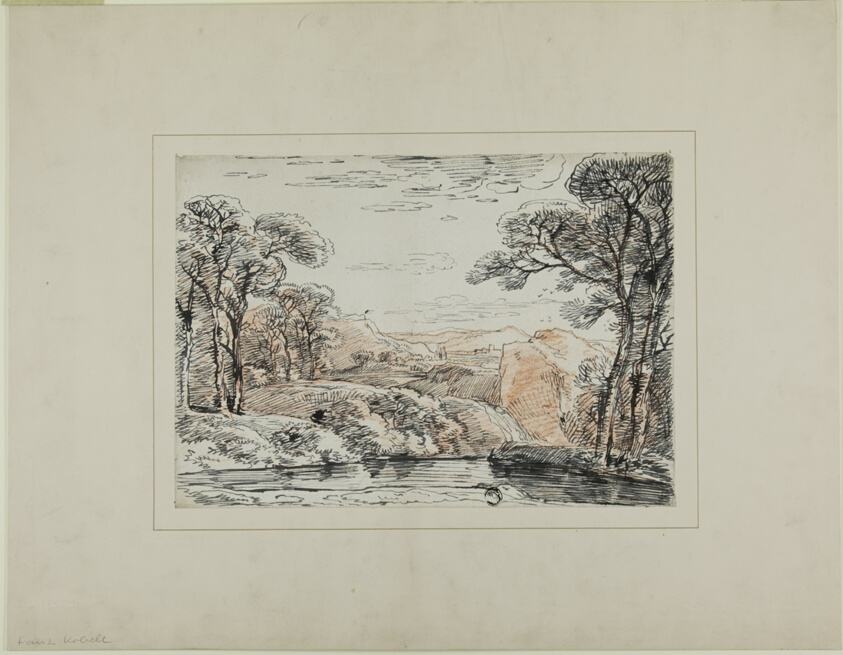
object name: Drawing and Watercolor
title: Landscape with River and Distant Hills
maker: Franz Kobell (German, 1749-1822)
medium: Pen and black ink, with red chalk, on ivory laid paper, mounted onto buff card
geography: Germany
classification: pen and ink drawings; drawings (visual works); prints and drawing